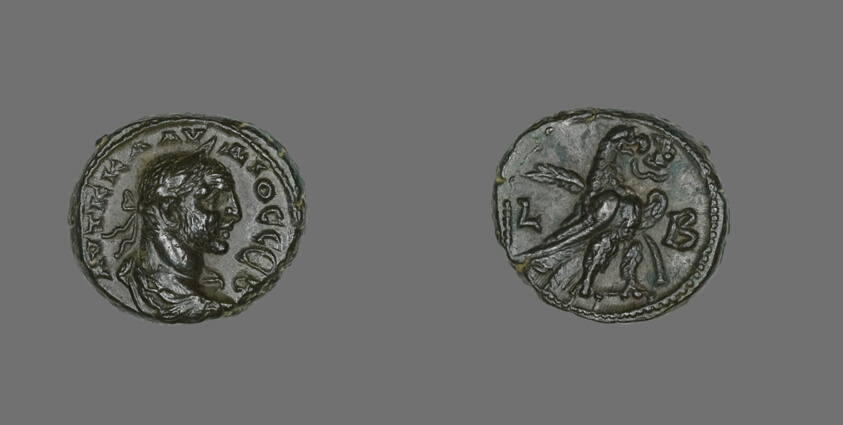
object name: Coin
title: Coin Portraying Emperor Claudius II Gothicus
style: roman (ancient, style or period), ancient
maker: Roman, minted in Alexandria, Egypt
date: 268-270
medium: Billon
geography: Roman Empire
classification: coin; ancient art